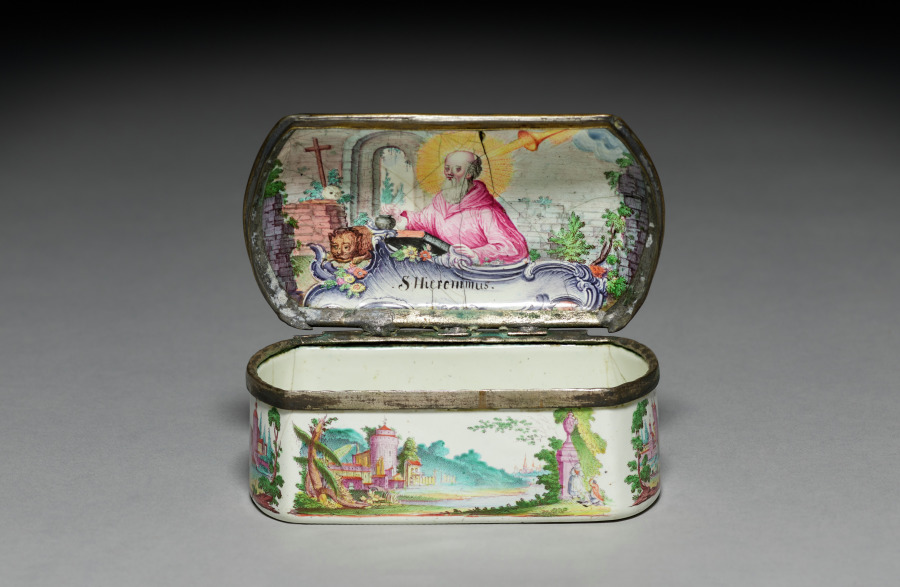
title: Snuff Box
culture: Austria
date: mid-1700s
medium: enamel on copper with metal mounts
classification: Miscellaneous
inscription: on interior of lid in a rococo cartouche: "S Hieronimus."